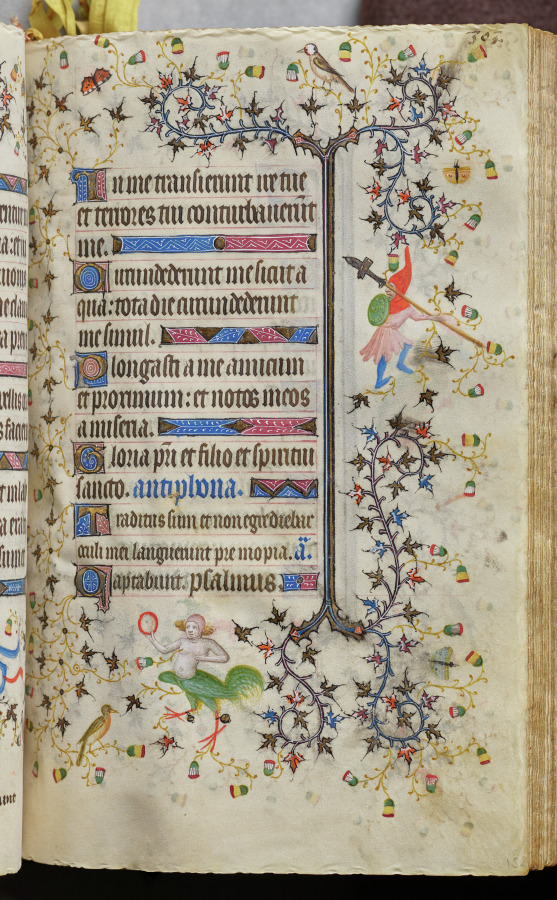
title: Hours of Charles the Noble, King of Navarre (1361-1425): fol. 152r, Text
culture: France, Paris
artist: Master of the Brussels Initials and Associates (French)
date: c. 1405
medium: ink, tempera, and gold on vellum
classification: Bound Volume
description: This precious volume was obviously highly prized by its owner, the French-born King of Navarre, who had his coat of arms painted on no less than twenty folios. Rather than directly commissioning this manuscript from a specific workshop, it seems that Charles the Noble acquired his book of hours -- perhaps ready-made for the luxury market -- while on a trip to Paris in 1404-05. A collaborative effort, six painting styles are evidenced within the pages of this codex, those of two Italians, two Frenchmen, and two Netherlanders. The painter who was responsible for the planning and decoration of the book, and who produced seventeen of the large miniatures, was a Bolognese artist known as the Master of the Brussels Initials. His principal assistant, responsible for most of the borders, was a Florentine who signed his name "Zecho" da Firenze on folio 208 verso.